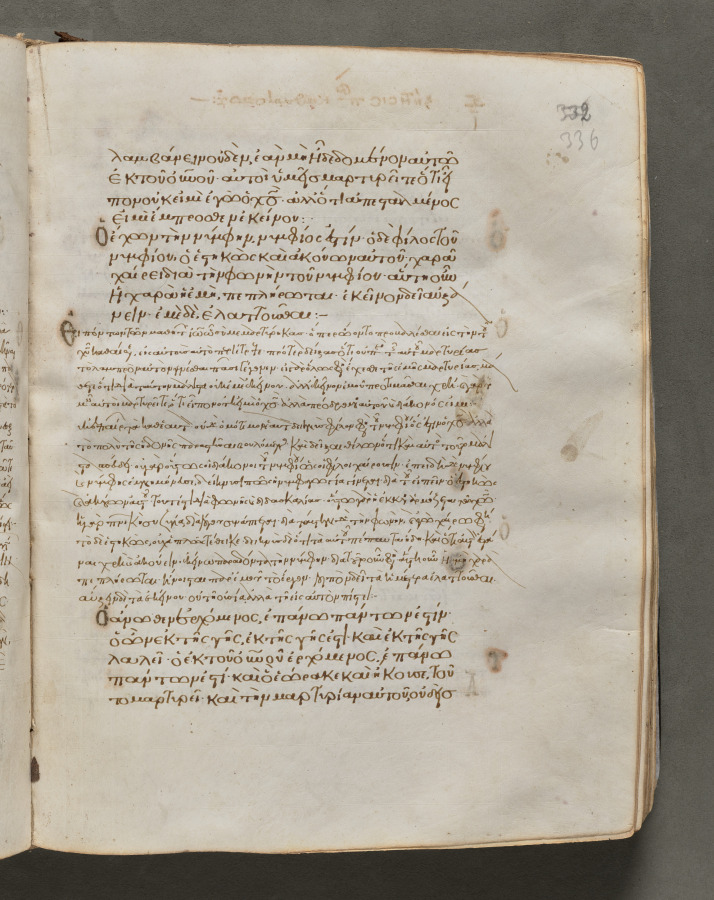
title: Text, folio 336 (recto), from a Gospel Book with Commentaries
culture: Byzantium, Constantinople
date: c. 1000–1100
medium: ink, tempera, and gold on vellum; leather binding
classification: Bound Volume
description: Each of the four gospels in this book opens on a page with brilliantly illuminated borders depicting the author of the text as well as birds—principally peacocks, symbols of the immortality of the soul—and fountains, representing the fountain of life and the salvation of the soul. This volume consists of 428 leaves with texts in Greek. Its level of sophistication suggests that it was probably written and decorated in a monastery in Constantinople.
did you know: Gospel books were carried in procession through Byzantine churches.